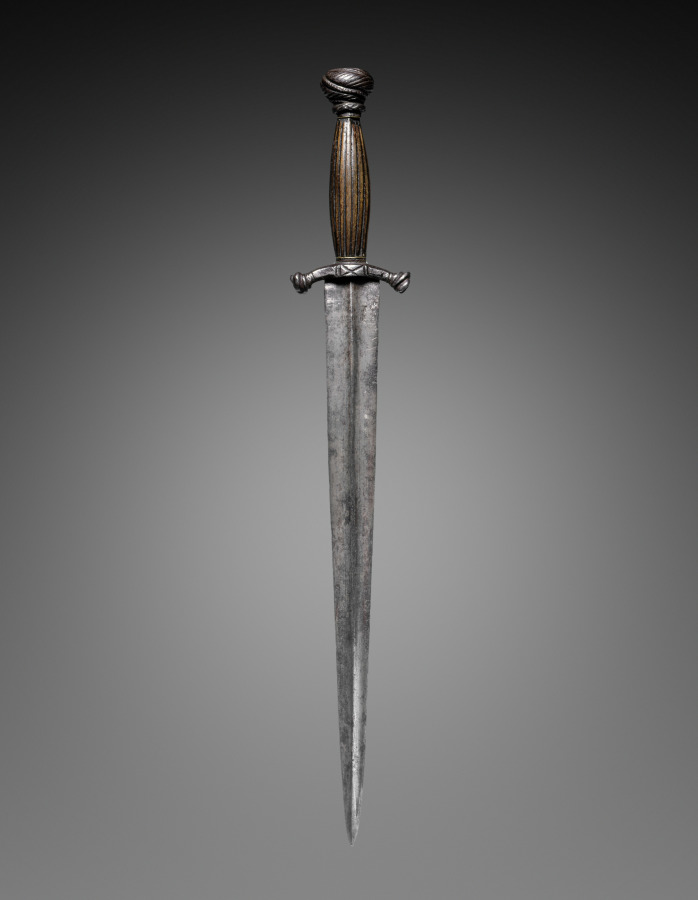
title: Dagger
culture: Germany, mid-16th century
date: mid 1500s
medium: steel; elk horn grip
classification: Arms and Armor